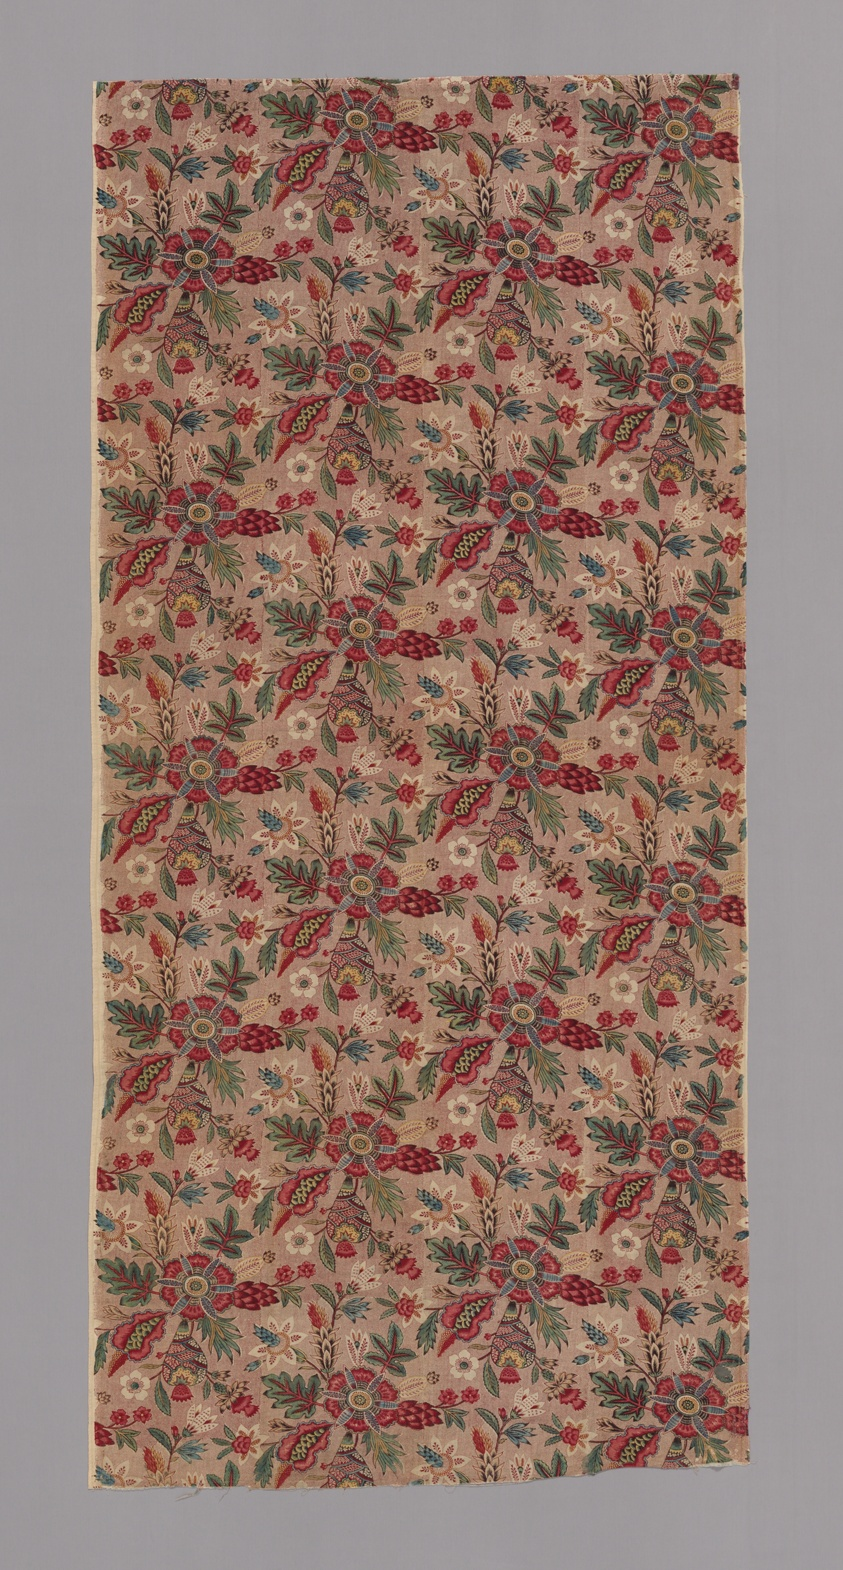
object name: Textile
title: Printed Fabric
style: 18th Century, jouy-en-Josas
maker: Possibly manufactured by Oberkampf Manufactory (French, 1760–1843); Jouy-en-Josas, France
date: 1780s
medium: Linen and cotton plain weave; block printed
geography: Jouy-en-Josas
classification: weaving - printed; garment; weaving; printed textile; textile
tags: flowers, floral motifs, foliage